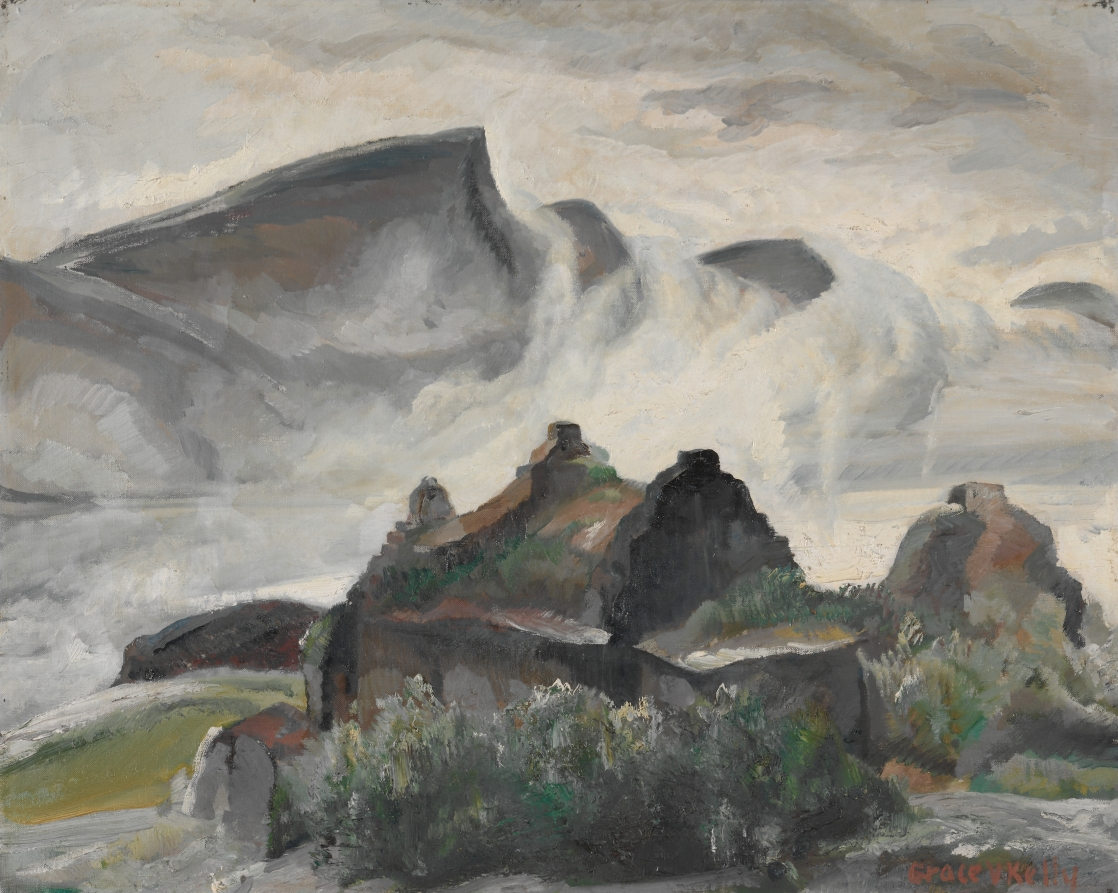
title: The White Mists of Keel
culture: America, Ohio, Cleveland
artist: Grace V. Kelly (American, 1877–1950)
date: 1929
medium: oil on canvas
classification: Painting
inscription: signed lower right: Grace V. Kelly